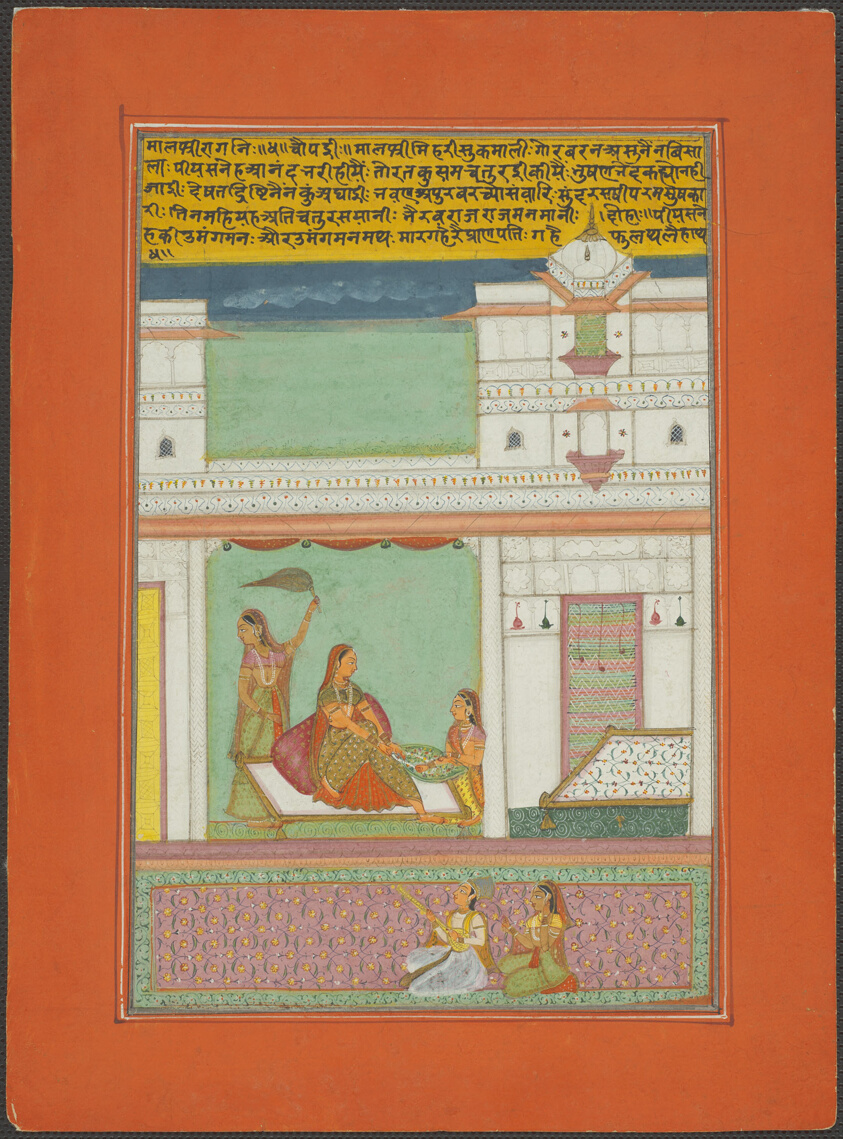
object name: Painting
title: Malashri Ragini, Page from a Jaipur Ragamala Set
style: South Asian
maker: India; Rajasthan, Jaipur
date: c. 1750-1770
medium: Opaque watercolor and gold on paper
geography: Rajasthan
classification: miniature painting; painting; asian art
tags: music, musicians